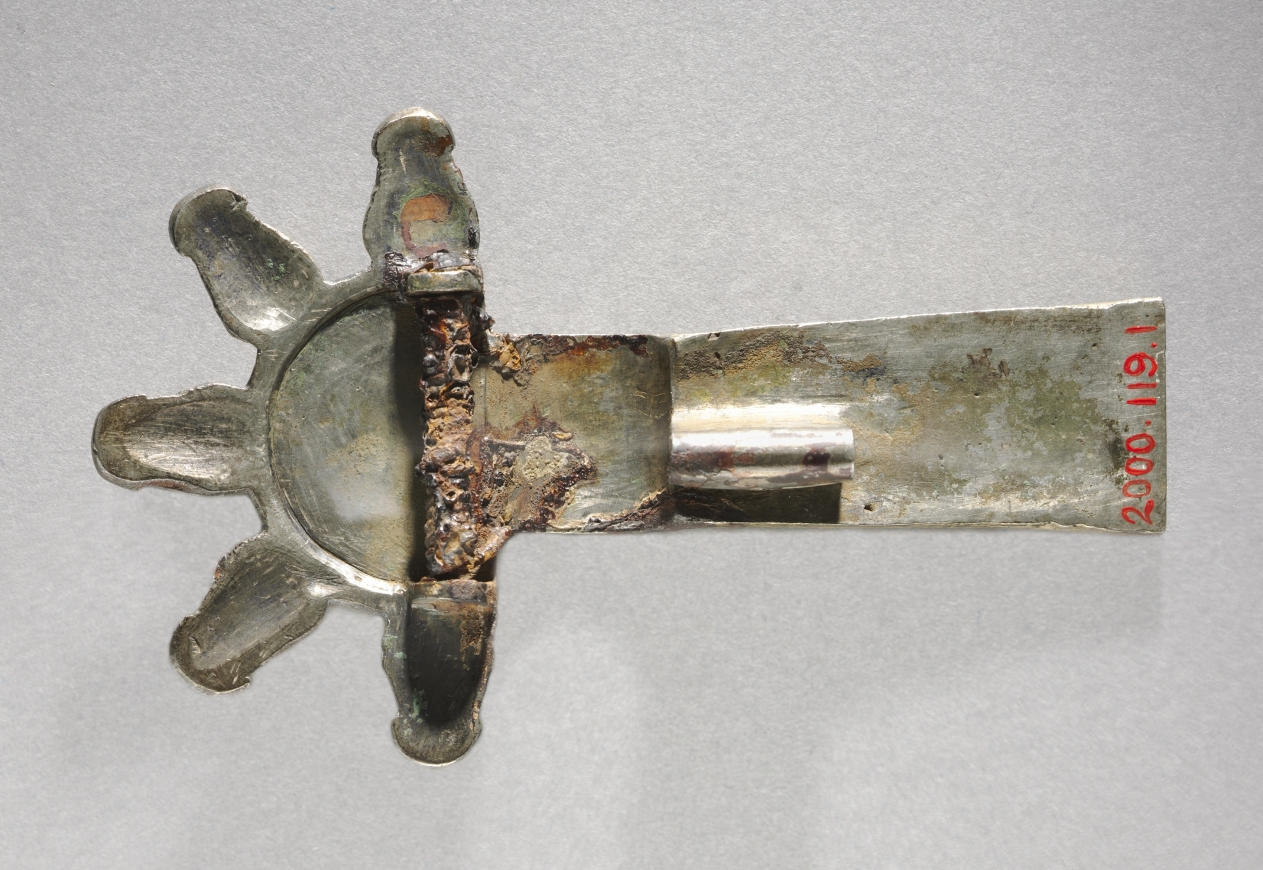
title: Fibulae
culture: Alemannic, Migration Period, 6th-7th century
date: 500s-600s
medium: cast silver, parcel-gilt, with niello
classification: Jewelry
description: A woman of high rank might have worn these twin fibulae on her shoulders, one fastening her inner garment on the right, the other her outer garment on the left. She might also have suspended them from her belt as decorative ornaments.